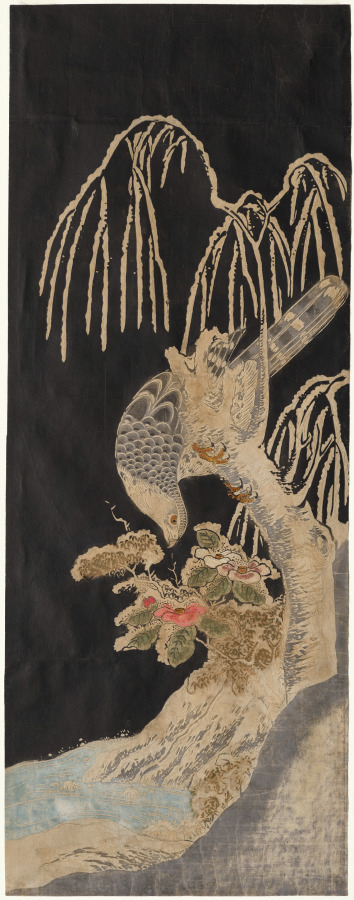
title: Falcon on a Willow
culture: Japan, Edo period (1615–1868)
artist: attributed to Isoda Koryūsai (Japanese, 1735–1790)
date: c. 1780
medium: color woodblock print with hand coloring; stonerubbing technique (ishizuri-e)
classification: Print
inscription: Collector's Seal: Vever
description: The technique here is marked by white lines and areas set against a dark background. Damp paper was placed on a carved wooden block and pressed into the engraved incisions. The paper was then hand colored, the sunken areas remaining white and appearing in reserve against the colored background. The effect is meant to resemble a stone rubbing, a traditional technique in China used to reproduce and preserve images on monuments on paper.